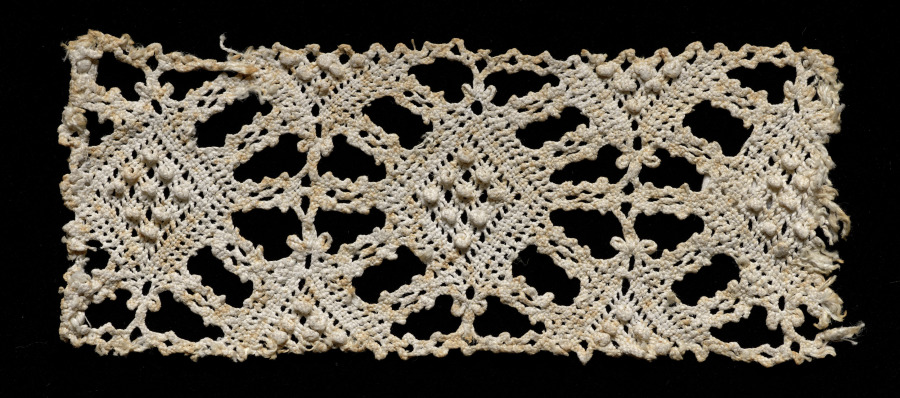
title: Lace Insertion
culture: Italy, Venice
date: 1540–60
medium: Bobbin lace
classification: Lace